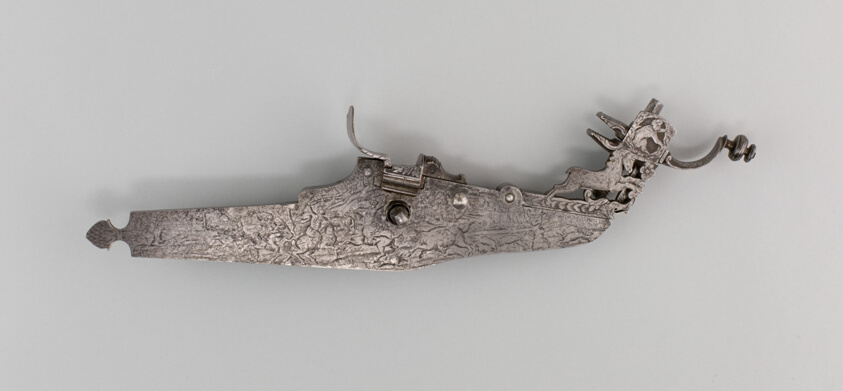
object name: Arms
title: Wheellock from a Rifle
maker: German or Austrian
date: 1670/90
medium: Steel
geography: Europe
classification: firearm-accessory; arms; arms and armor